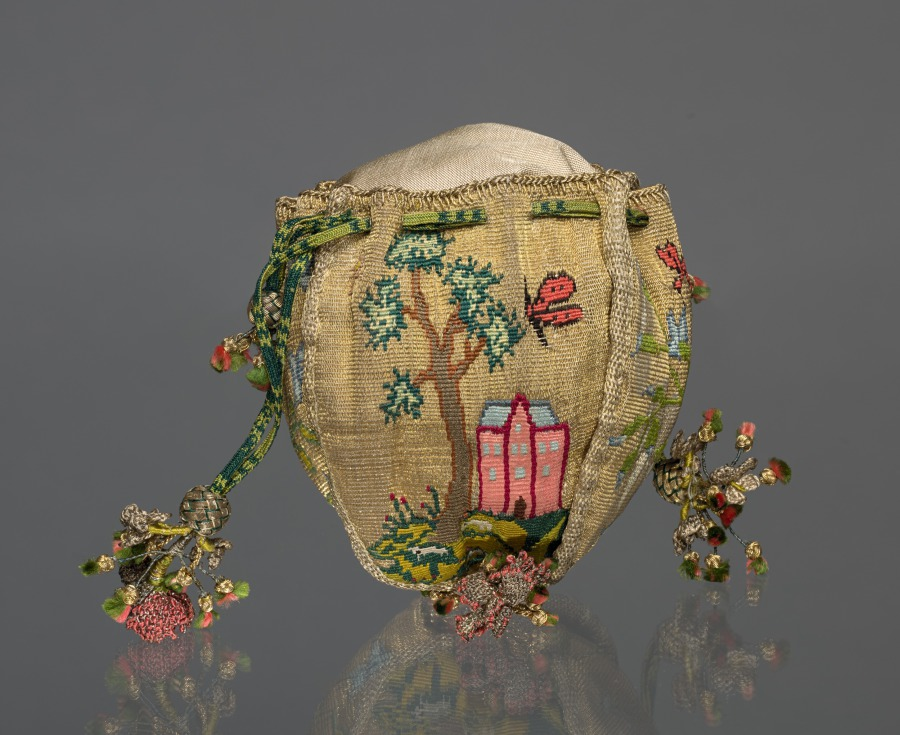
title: Woven Purse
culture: France, 18th century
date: 1700s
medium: tapestry, silk and gold thread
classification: Garment